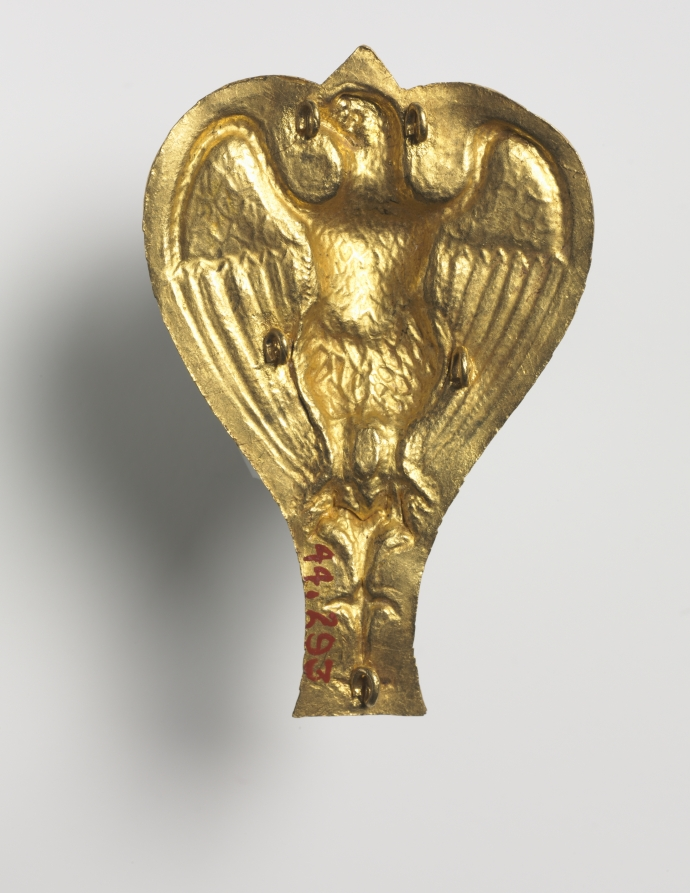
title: Ornament with Eagle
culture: Italy, Roman, Imperial Roman period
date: 1–300 CE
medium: gold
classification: Metalwork